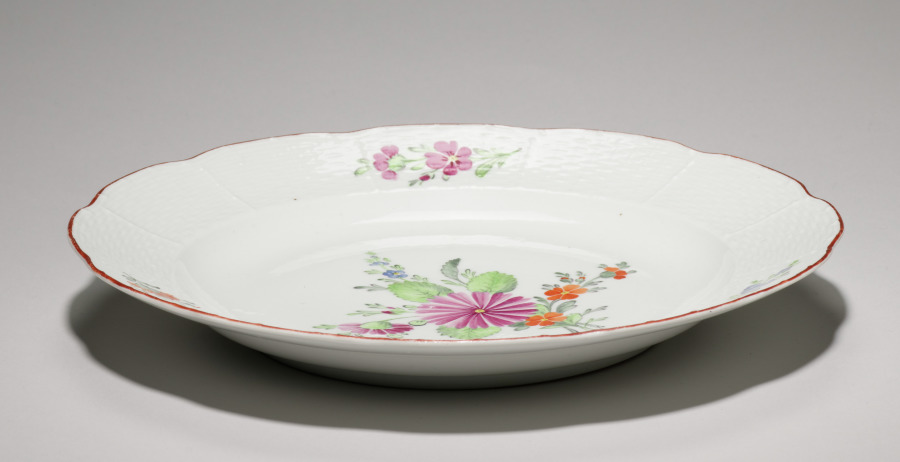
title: Plate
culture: Russia, St. Petersburg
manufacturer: St. Petersburg Imperial Porcelain Factory (Russian)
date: 1762–1796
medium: porcelain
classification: Ceramic